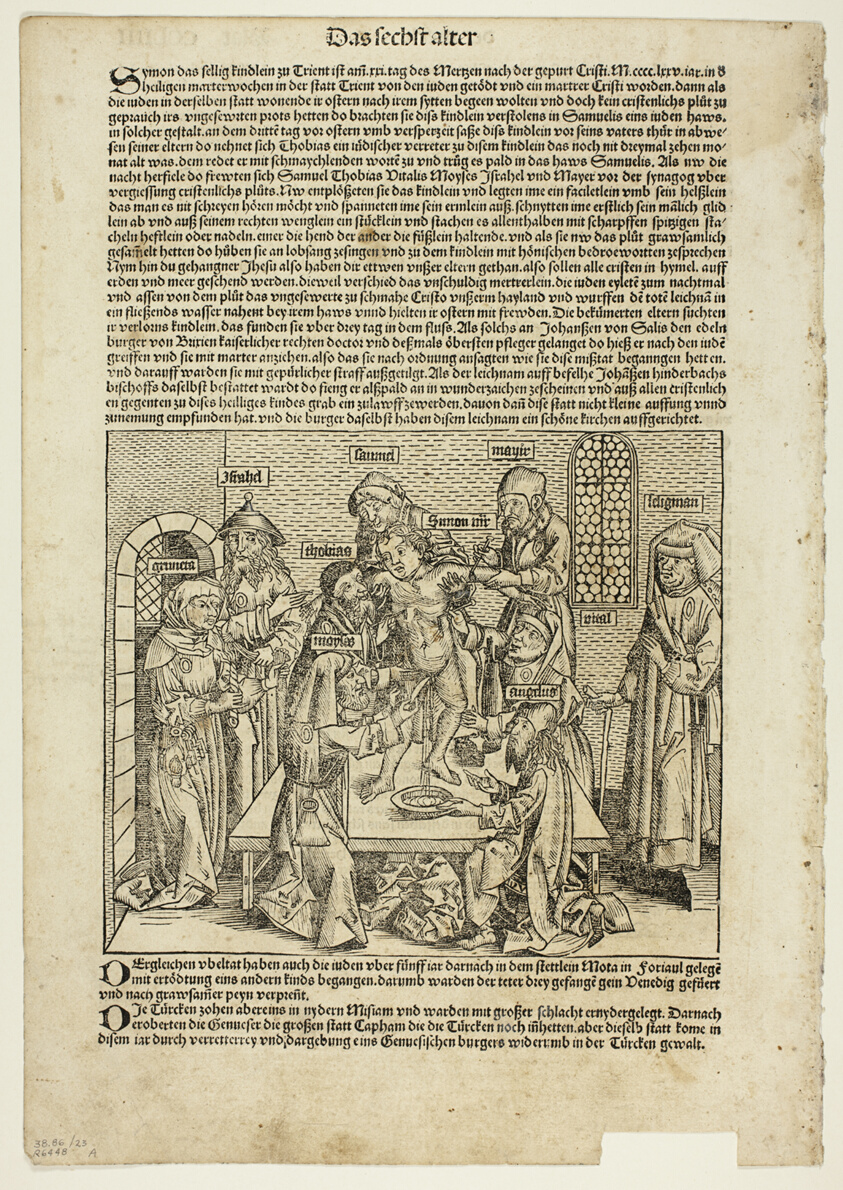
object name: Print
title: The Martyrdom of Saint Simon of Trent from Schedel Weltchronik (Schedel’s World History), Plate 23 from Woodcuts from Books of the 15th Century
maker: Michel Wolgemut (German, 1434/37–1519) and Wilhelm Pleydenwurff (German, c. 1460–1494); printed and published by Anton Koberger (German, c. 1440/45–1513); original text by Hartmann Schedel (German, 1440–1514); portfolio text by Wilhelm Ludwig Schreiber (German, 1855–1932)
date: 1493, portfolio assembled 1929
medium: Woodcut and letterpress in black (recto and verso) on buff laid paper, tipped onto cream wove paper mat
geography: Germany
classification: woodcut; print; prints and drawing